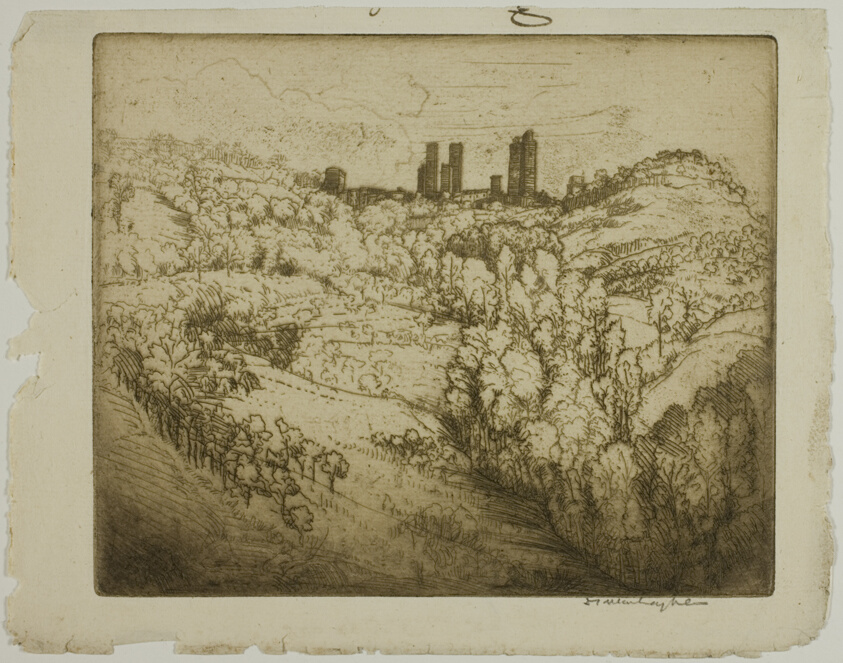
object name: Print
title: The Hill City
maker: Donald Shaw MacLaughlan (American, born Canada, 1876-1938)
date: 1909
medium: Etching in brown on cream laid paper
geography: United States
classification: etching; print; prints and drawing